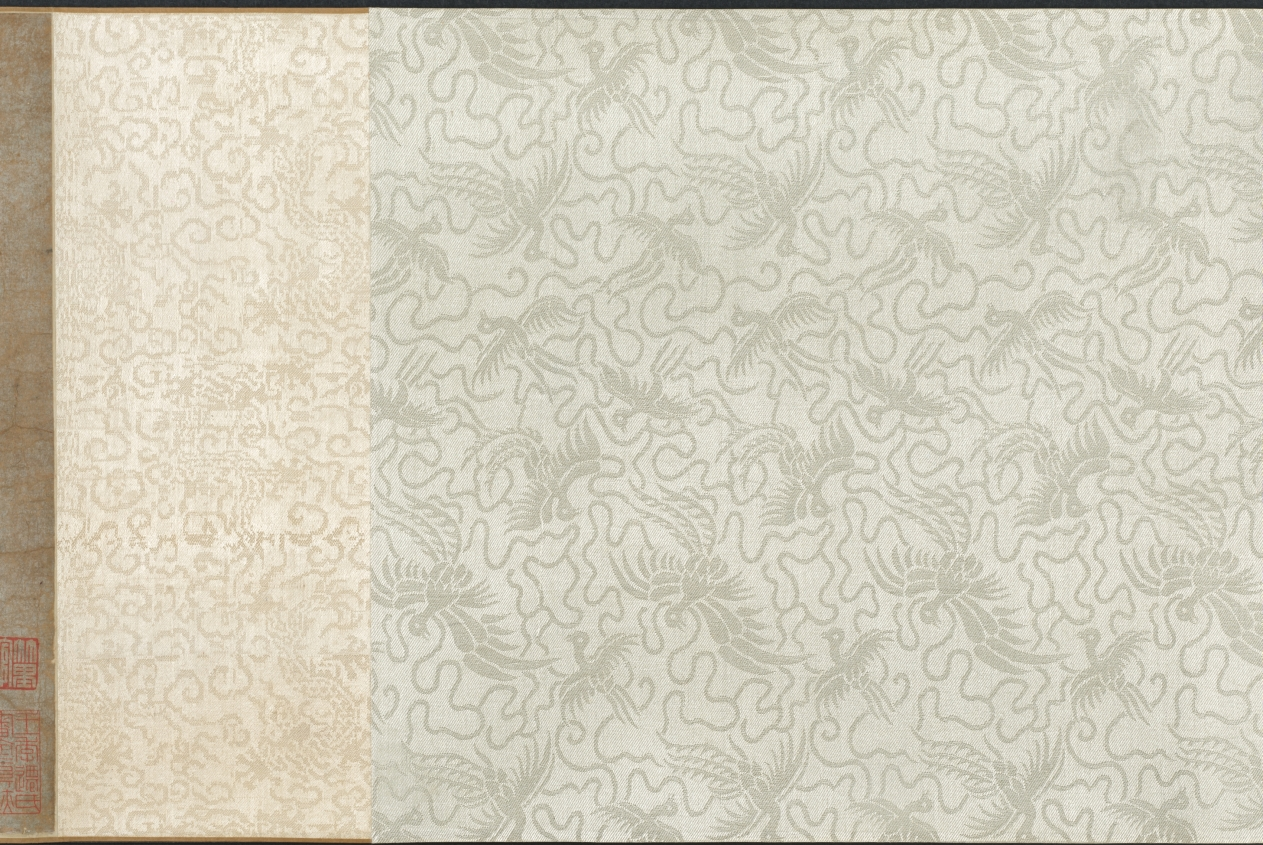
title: Scholar-Hermits in the Autumn Mountains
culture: China, Ming dynasty (1368–1644)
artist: Tang Yin (Chinese, 1470–1523)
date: 1500–1510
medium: handscroll, ink and light color on silk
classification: Painting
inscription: Artist's signature and 2 seals at end of scroll: Tang Yin [seals] T'ang Po-hu; T'ang Tzu'wei t'u-shu.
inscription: Title on frontispiece by Li Cho-kung (dates unknown).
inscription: 1 colophon and 11 additional seals: 1 colophon dated 1915 of Wu Tso-hsi (19th-20th c.); 2 seals of Gao Qifeng 高奇峰 (1889–1933); 5 seals of C. C. Wang 王季遷 (1907–2003); 4 seals unidentified.